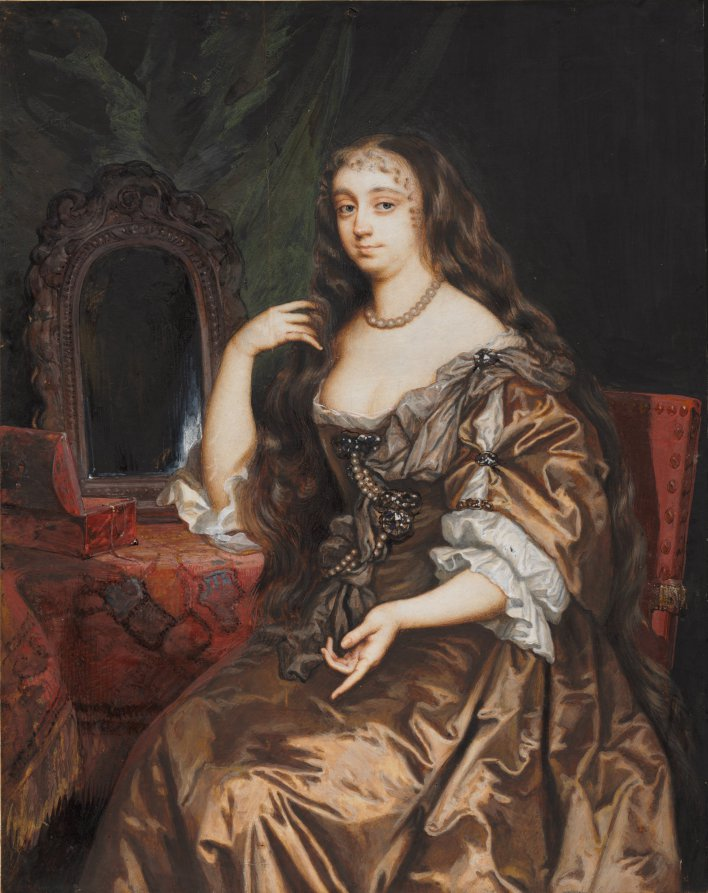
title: Portrait of Anne Hyde, Duchess of York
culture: England, 17th century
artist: Nicholas Dixon (British, c. 1708)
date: c. 1662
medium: watercolor on vellum in a large wooden frame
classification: Portrait Miniature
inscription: Label inside of back: Henry J. Murcott, London. Written in ink on backing: "Anny Hyde, first Wife of James II, Mother of Queen Mary II, Queen Anne. From Lord Currie's collection."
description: Though knowledge about his birth and training remain obscure, Nicholas Dixon is known to have been a favorite miniature painter of the English court at the close of the seventeenth century. He succeeded Samuel Cooper (1608/9–1672) as limner to King Charles II in 1673 and was Keeper of the King’s Picture Closet, for which he was granted an irregularly paid annuity of £200. Dixon painted a substantial number of ambitiously scaled miniatures—which became increasingly uncommon among practitioners of the art form when the more constrictive support of ivory supplanted vellum in the early 1700s. Dixon often signed his work with the monogram ND, and many of his large cabinet miniatures were copies of portraits, religious scenes, and mythological paintings by old masters, thirty of which formed part of the collection of the dukes of Portland. Among the characteristics of his style are ruddy flesh tones and drowsy eyes, and like the work of John Hoskins (c. 1590–1665), who may have been his teacher, Dixon favored softer modeling and diffuse lighting of his subjects, as opposed to the dramatic shadows employed by Cooper. Two lottery schemes—one in 1684/85 and the other in 1698— involving the exhibition of miniatures and the distribution of cash prizes proved disastrous for Dixon, who was in financial ruin by 1700 and constrained to sell a large number of works from the lottery. Anne Hyde (1637–1671), the sitter in this portrait, was around the age of twenty-four when the miniature was painted. She faces right and sits upon a dull red chair before a dressing table covered with a deep red embroidered cloth or tapestry that is fringed at the edges. A mirror and open jewel box lie on a table that is in front of a dark green curtain. The sitter has gray eyes and wears a golden brown satin décolleté dress with white ruffled undersleeves ornamented with jeweled closures. A necklace of large pearls hangs around her neck, and jeweled brooches fasten a winding rope of pearls to the bodice of her gown. Her right elbow rests on the table, and her fingertips comb through her long, wavy brown hair, which falls over her shoulders to below her waist. Her left arm extends toward her knee as she lightly holds a measure of her sash under her thumb while pointing downward with her index finger. The gracefully arranged, tapered fingers indicate Restoration court refinement.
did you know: This portrait is after a well-known and frequently copied oil painting by Peter Lely; it is nearly identical but with crimson and gold drapery in place of the dressing table and mirror.